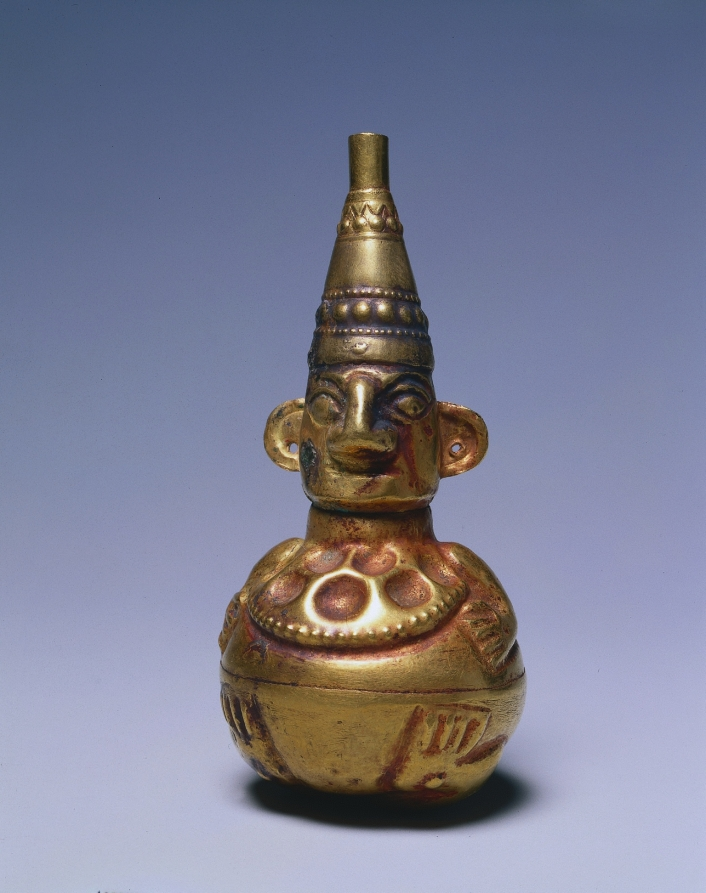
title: Figural Flask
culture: Peru, North Coast, Lambayeque Valley, Sicán or Chimú, 9th-15th Century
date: c. 800–1470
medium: hammered and embossed gold alloy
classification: Metalwork